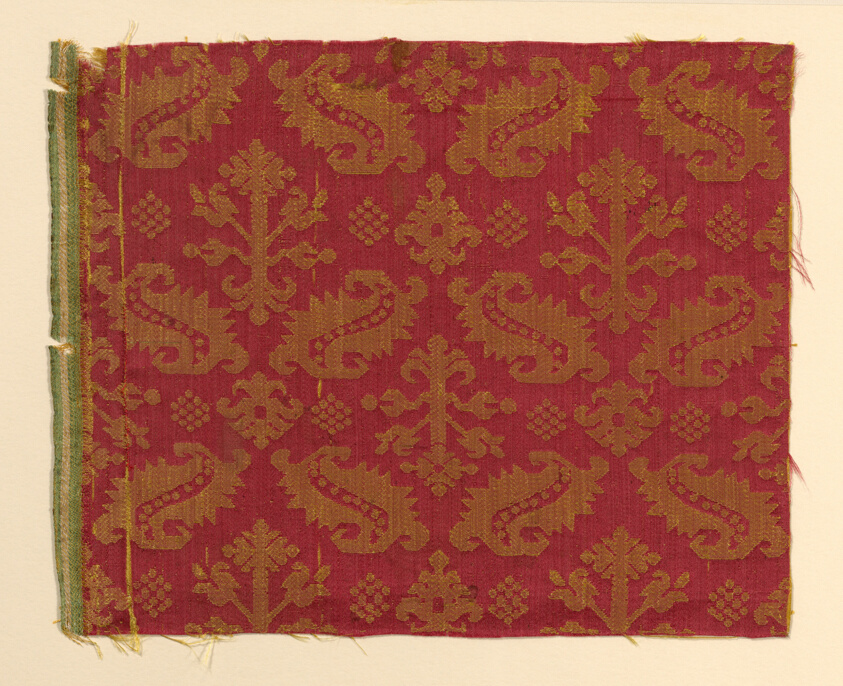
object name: Textile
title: Fragment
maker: Italy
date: 1600/50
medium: Silk, satin weave self-patterned by reversing of faces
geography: Italy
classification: textile; weaving